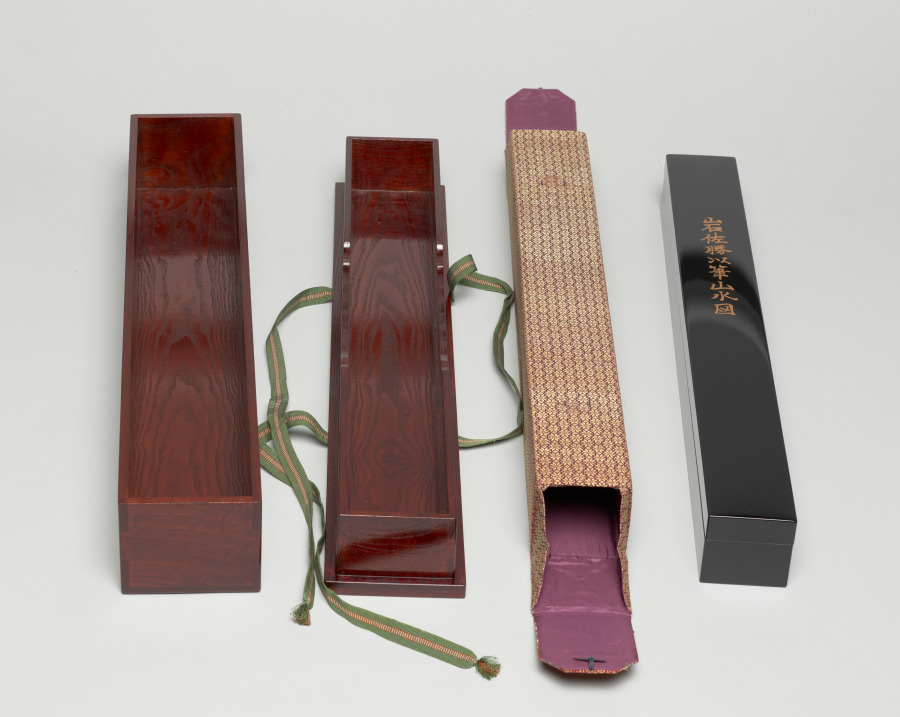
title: Coastal Landscape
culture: Japan, Momoyama period (1573–1615)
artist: Iwasa Matabei (Japanese, 1578–1650)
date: 1573–1615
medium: hanging scroll; ink on paper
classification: Painting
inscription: signed: signature unread